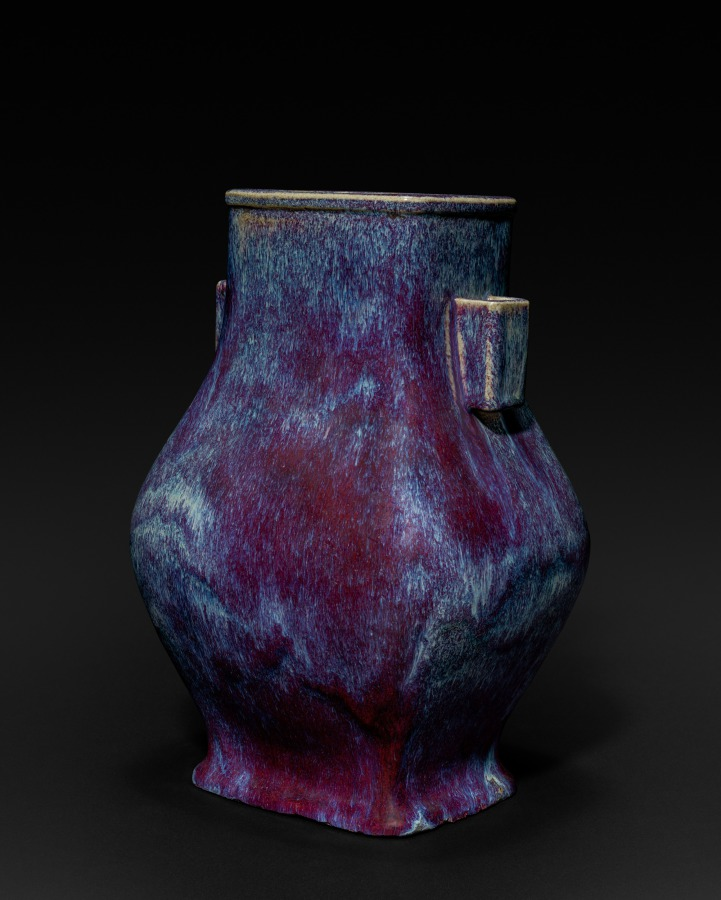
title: Flambé Vase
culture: China, Qing dynasty (1644–1911)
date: 1644–1911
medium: porcelain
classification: Ceramic